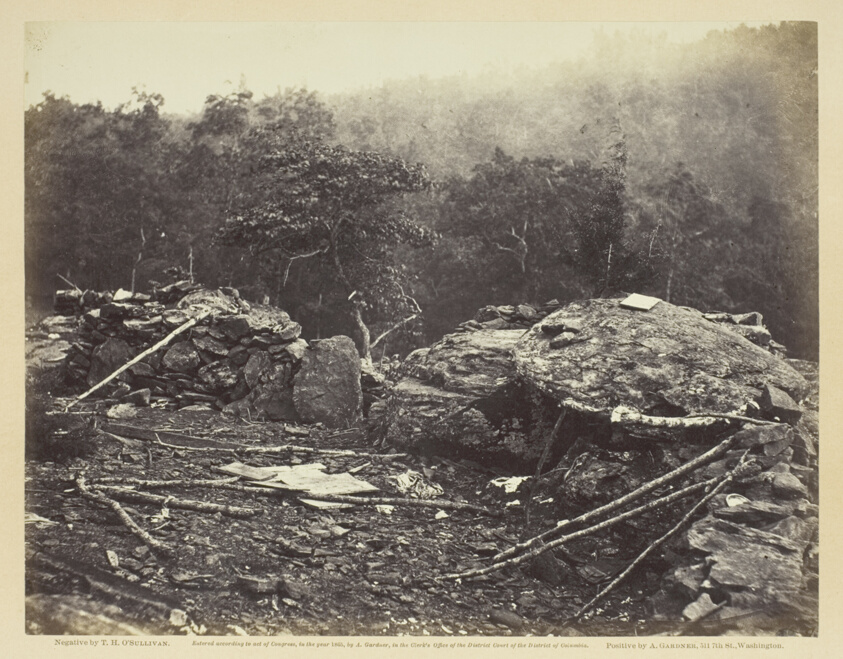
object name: Photograph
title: Interior of Breastworks on Round Top, Gettysburg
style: 19th century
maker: Timothy O'Sullivan (American, born Ireland, 1840–1882)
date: July 1863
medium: Albumen print, pl. 38 from the album "Gardner's Photographic Sketch Book of the War, vol. 1" (1866)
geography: United States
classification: photograph; albumen silver print; photography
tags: Collected by Hugh Edwards, Gardner's Photographic Sketch Book